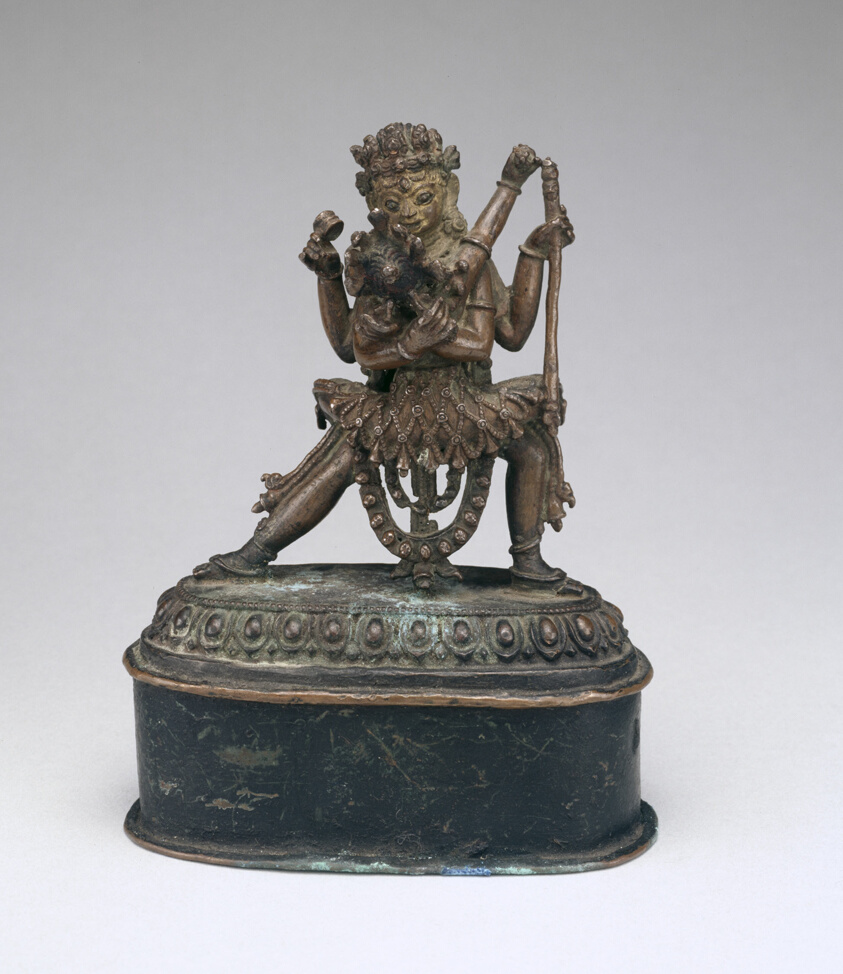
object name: Sculpture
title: Deities Chakrasamvara and Vajravarahi in Ritual Embrace (Yab-Yum)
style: Himalayan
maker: Tibet or Nepal; Southern Tibet or Nepal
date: 16th century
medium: Bronze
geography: Nepal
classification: bronze; metal; sculpture; asian art